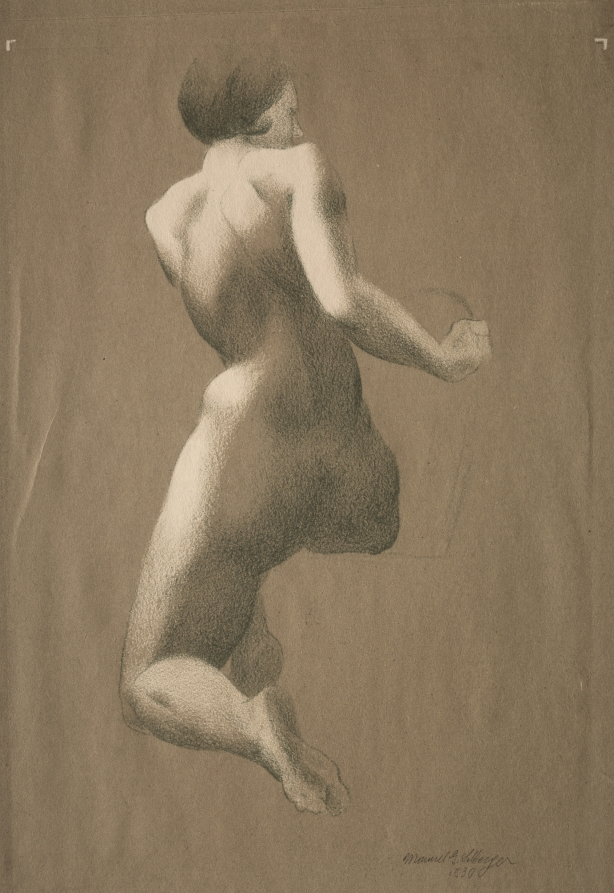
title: Nude, No. 1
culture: America, Ohio, Cleveland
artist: Manuel G. Silberger (American, 1898–1968)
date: 1930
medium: lithograph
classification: Print